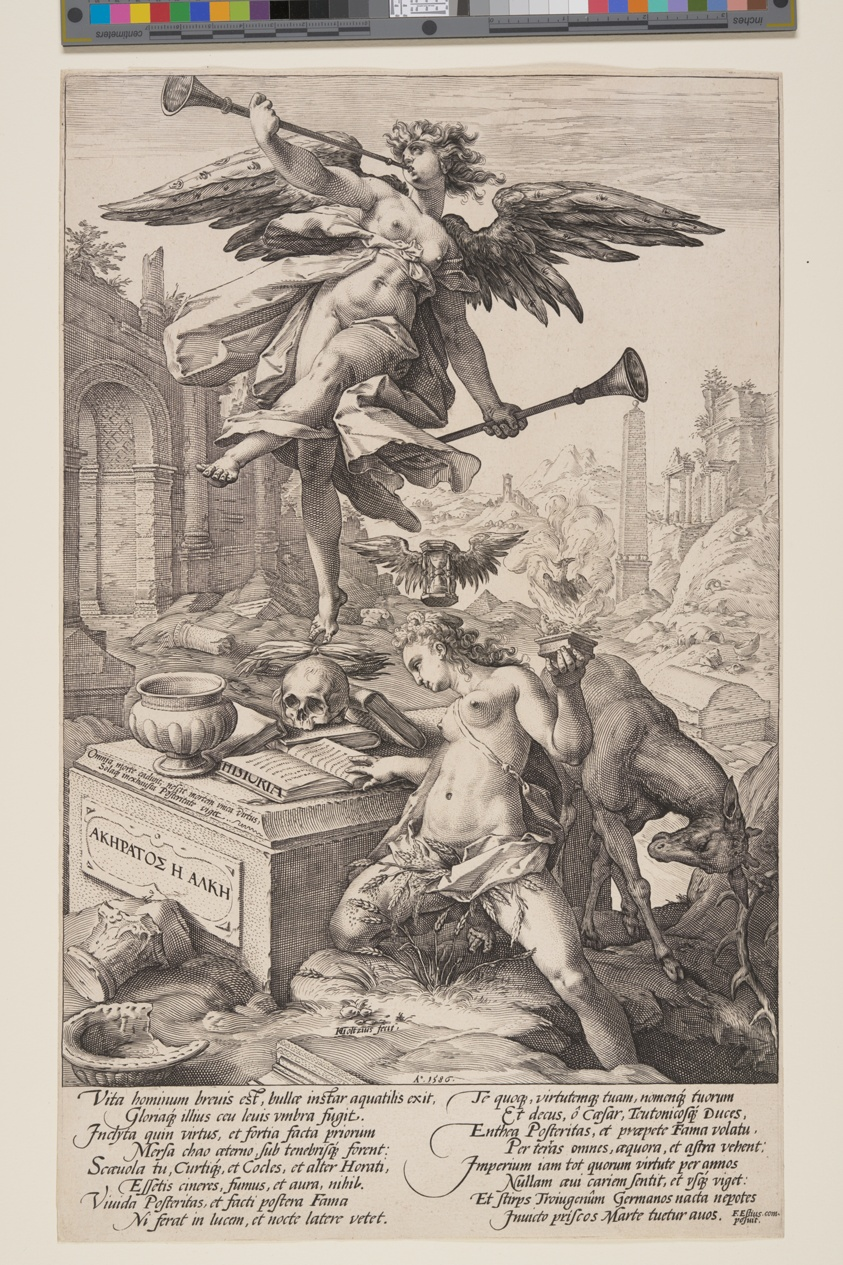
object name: Print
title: Allegory of Fame and History, from The Roman Heroes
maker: Hendrick Goltzius (Dutch, 1558–1617)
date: 1586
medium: Engraving on ivory laid paper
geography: Netherlands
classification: print; paper; prints and drawing; engraving